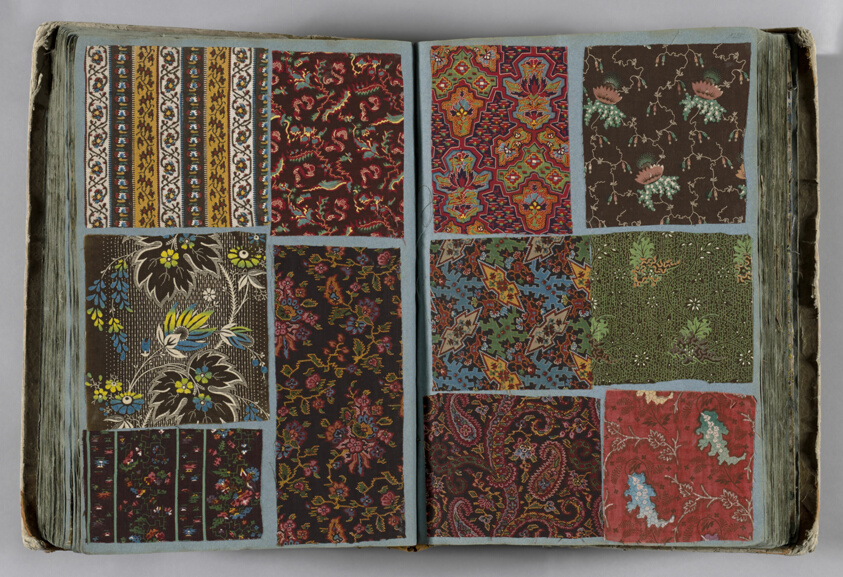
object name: Book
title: Sample book of swatches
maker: Mulhouse, France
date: 19th c.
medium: Sample book of swatches: cotton, plain weave, block printed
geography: France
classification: book; printed; weaving - printed